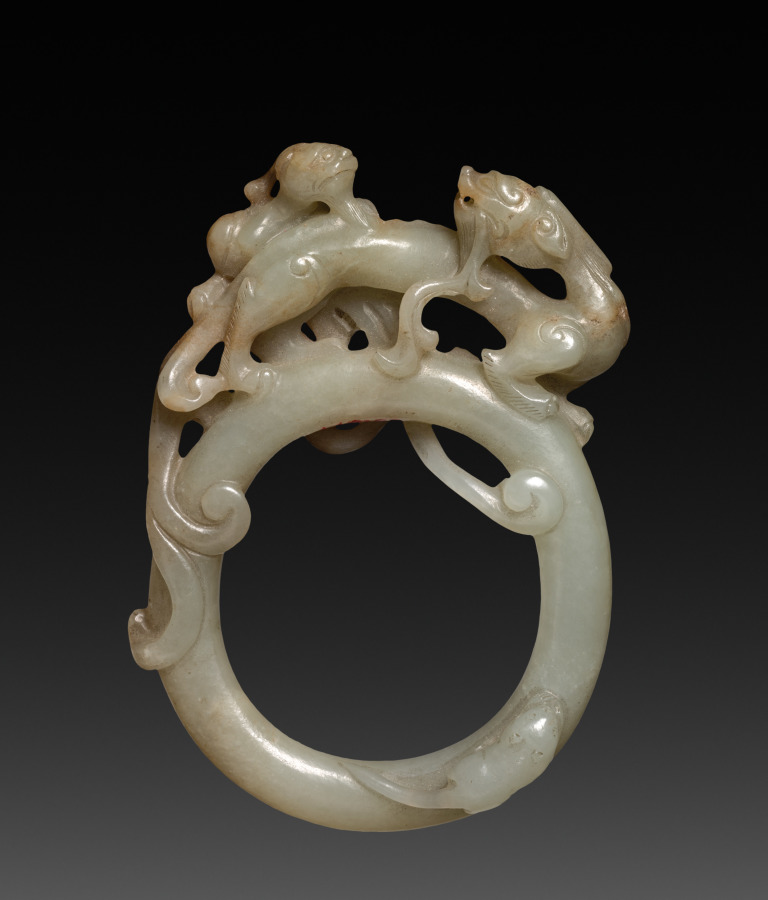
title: Ring with Carved Dragons (Ch'ih)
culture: China, Six Dynasties period (220–589 CE)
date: 400s CE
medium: jade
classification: Jade